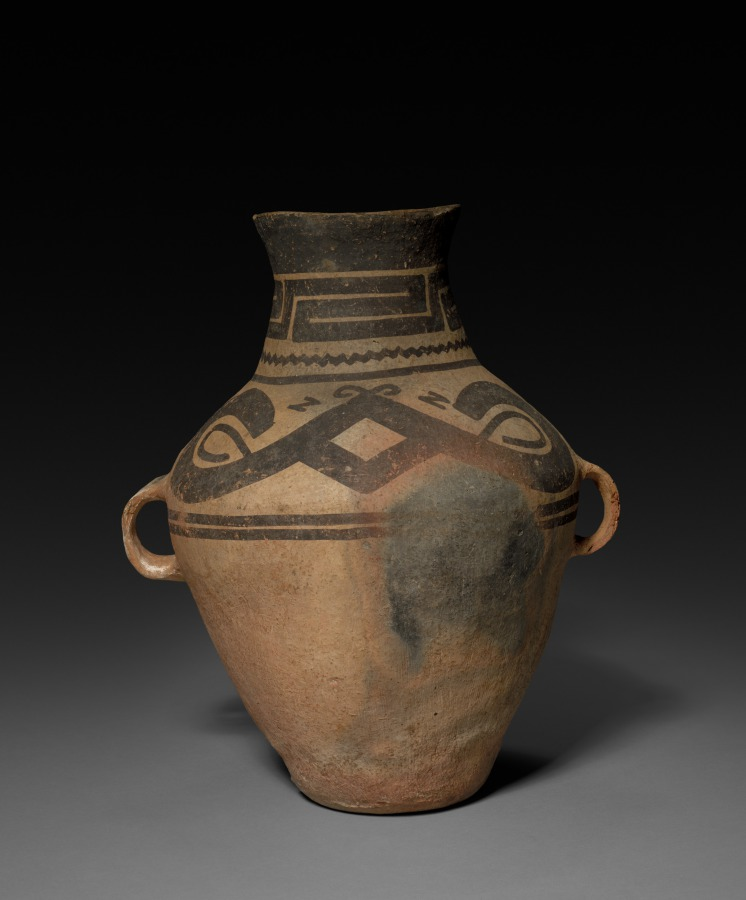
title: Urn with Lug Handles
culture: China, Gansu province, Xindian Culture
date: c. 1300–1000 BCE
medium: earthenware with slip coating and painted decoration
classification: Ceramic